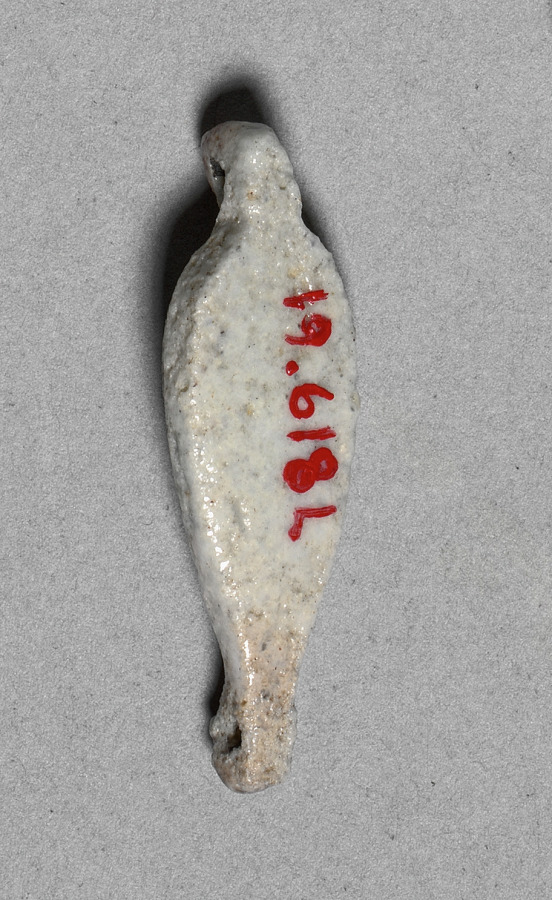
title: Petal-Shaped Bead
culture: Egypt, New Kingdom (1540–1069 BCE), Dynasty 18, reign of Amenhotep III (1390–1352 BCE)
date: c. 1391–1353 BCE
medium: faience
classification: Jewelry